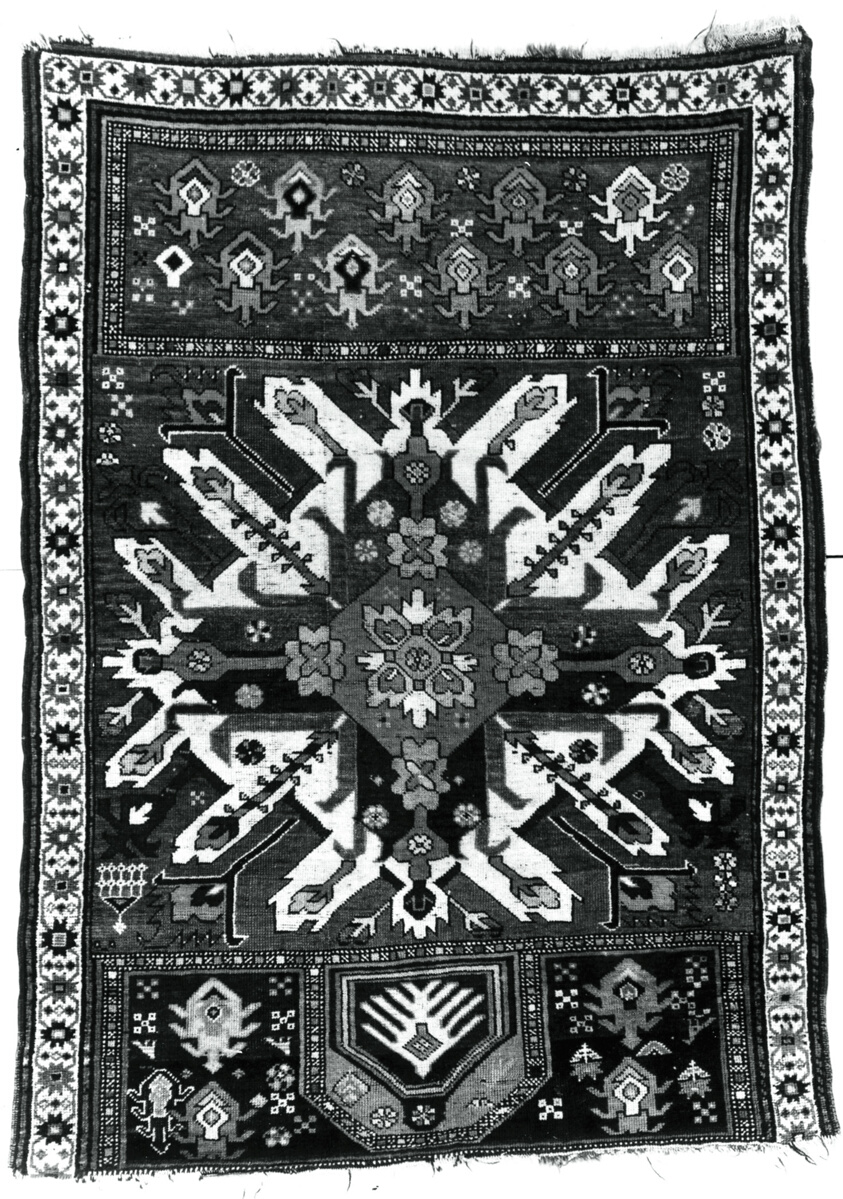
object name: Textile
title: Karabagh Prayer Rug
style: kazak, caucasian, central asian, asian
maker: Kazakhstan, Caucasus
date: 1875/1900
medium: Wool, plain weave with supplementary wrapping wefts forming cut solid pile through a technique known as "Ghiordes knots"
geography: Caucasus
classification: weaving - carpet; textile